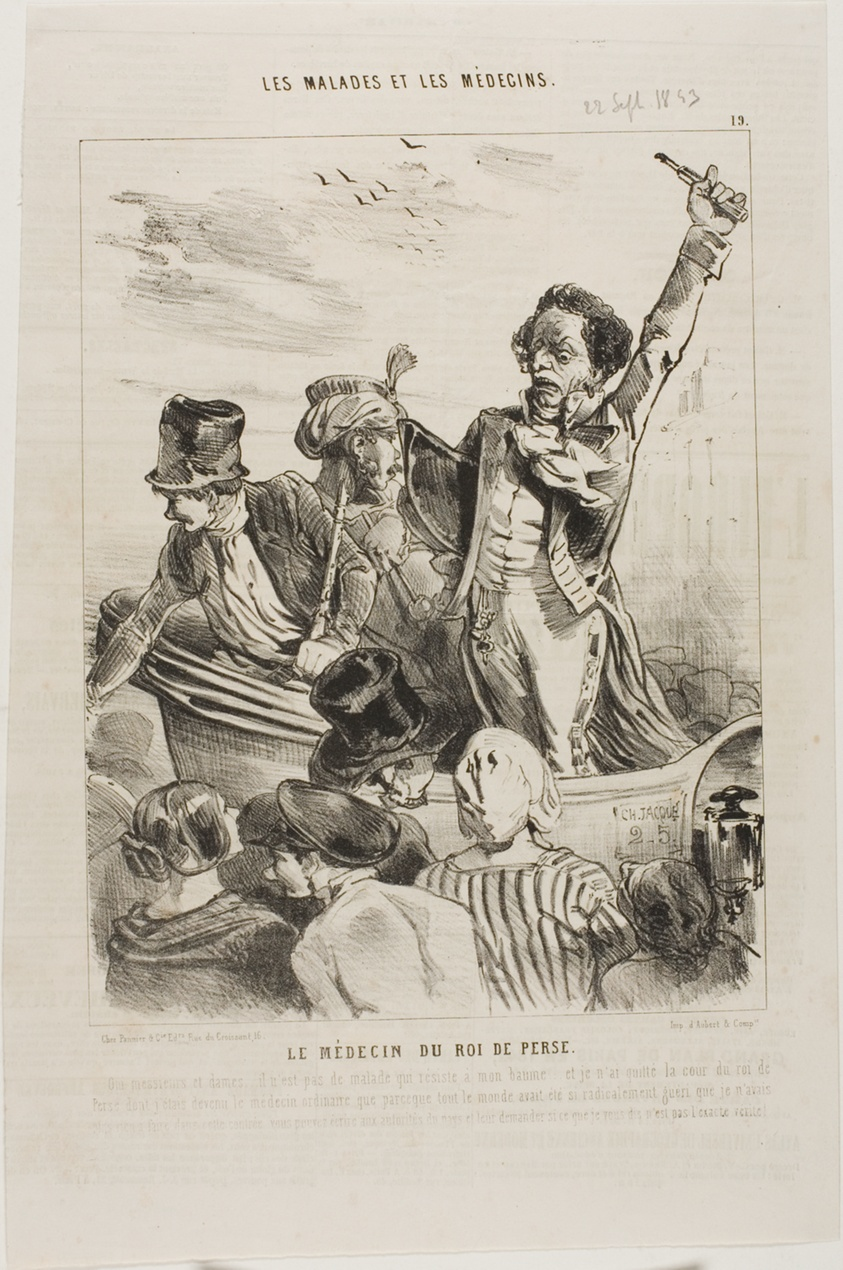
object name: Print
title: The King of Persia's Doctor (plate 19)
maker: Charles Émile Jacque (French, 1813-1894)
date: 1843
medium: Lithograph in black on ivory wove paper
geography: France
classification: lithograph; print; prints and drawing